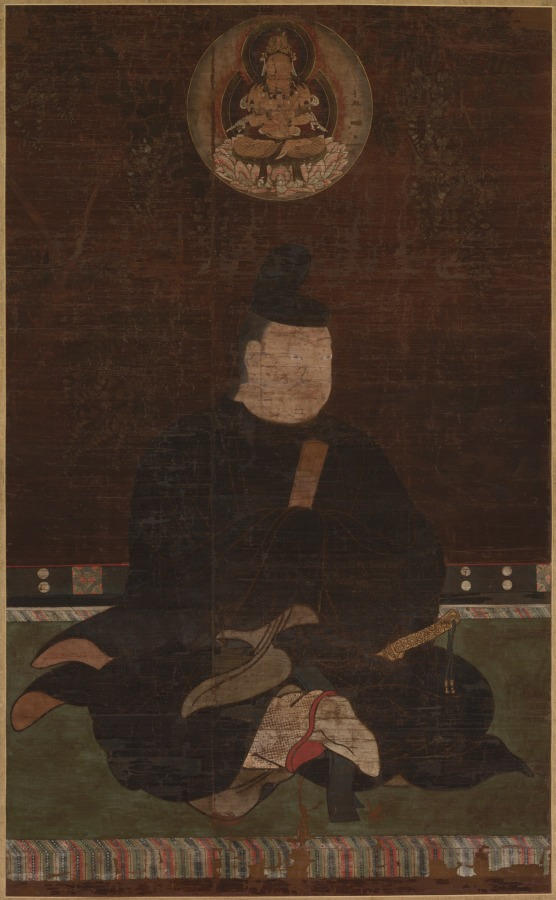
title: Fujiwara no Muchimaro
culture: Japan, Kamakura period (1185–1333)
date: 1200s or 1300s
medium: Hanging scroll; ink, color, gold, and cut gold on silk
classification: Painting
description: This portrait of Fujiwara no Muchimaro (680–737), a grandson of Fujiwara no Kamatari (614–669), includes an image of Buddha Dainichi Nyorai above his head. By situating the image of Dainichi there, this painting would seem to assert that Muchimaro is an avatar of Dainichi. In the same way that kami could be identified with Buddhist counterparts, powerful humans could also be seen as manifestations of Buddhist deities. A similar painting is at Eizanji in Nara, of which Muchimaro is known as the founder. It was once a branch temple of Kōfukuji, the Fujiwara family temple.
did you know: The boughs of wisteria appearing in the background symbolize the figure's status as a Fujiwara family member.